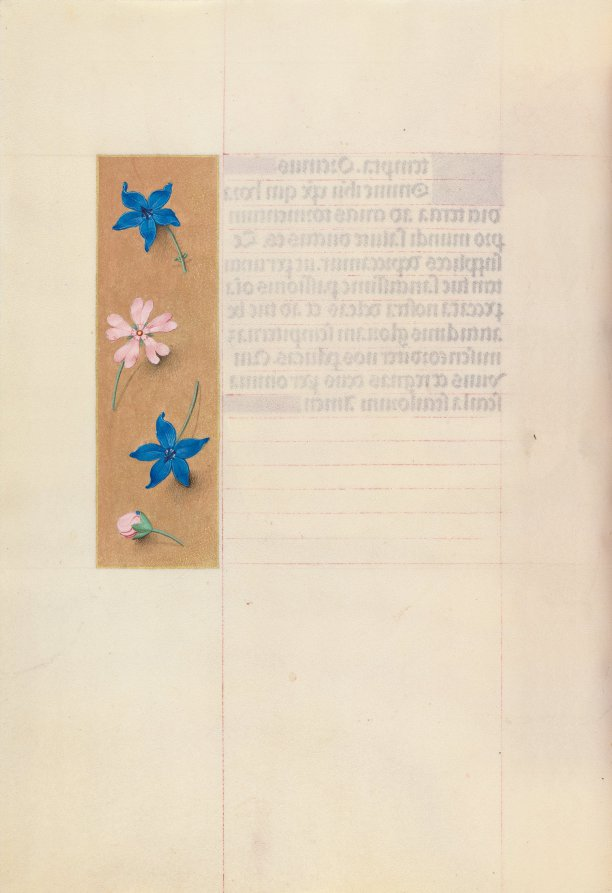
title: Hours of Queen Isabella the Catholic, Queen of Spain: Fol. 65v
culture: Flanders, Ghent and Bruges, late 15th century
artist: Master of the First Prayerbook of Maximillian (Flemish, c. 1444–1519)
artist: and Associates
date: c. 1500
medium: ink, tempera, and gold on vellum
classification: Bound Volume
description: This manuscript was illuminated by a circle of at least five highly organized manuscript painters active in the Flemish cities of Ghent and Bruges. The principal illuminator was Alexander Bening, who painted the majority of the book's miniatures. Manuscripts produced by this circle of artists are renowned for the decoration of their borders, which typically feature a rich variety of realistically-painted flowers, birds, and butterflies. This prayer book, called a book of hours, was intended not for a cleric, but for the private devotions of a lay person-in this case, Isabella the Catholic, Queen of Spain (1451-1504). Isabella's coat of arms embellishes the book's frontispiece. It is unlikely that the book was commissioned by the Queen herself; rather, she probably received it as a diplomatic gift from someone courting her patronage, perhaps Cardinal Francisco Jimenez de Cisneros. A Franciscan friar, Jimenez was dependent upon Isabella for his advancement, first to the post of Queen's confessor in 1492, and then to Archbishop of Toledo in 1495.